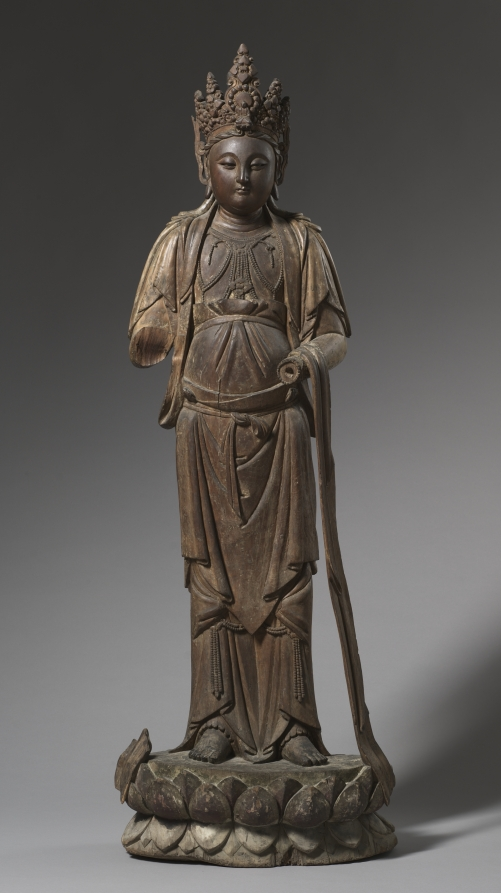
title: Standing Guanyin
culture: China, Southern Song dynasty (1127–1279)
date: 1127–1279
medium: wood with traces of gesso, polychromy and gilding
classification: Sculpture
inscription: Inscribed on scarf end: [for] our mentor Yüan-sheng [from] abbot-priest Ch'eng-lang, disciple Chin-yen, and second-generation disciple Wu-huai (trans. Wai-kam Ho)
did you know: This bodhisattva Guanyin was carved from a single block of willow wood.